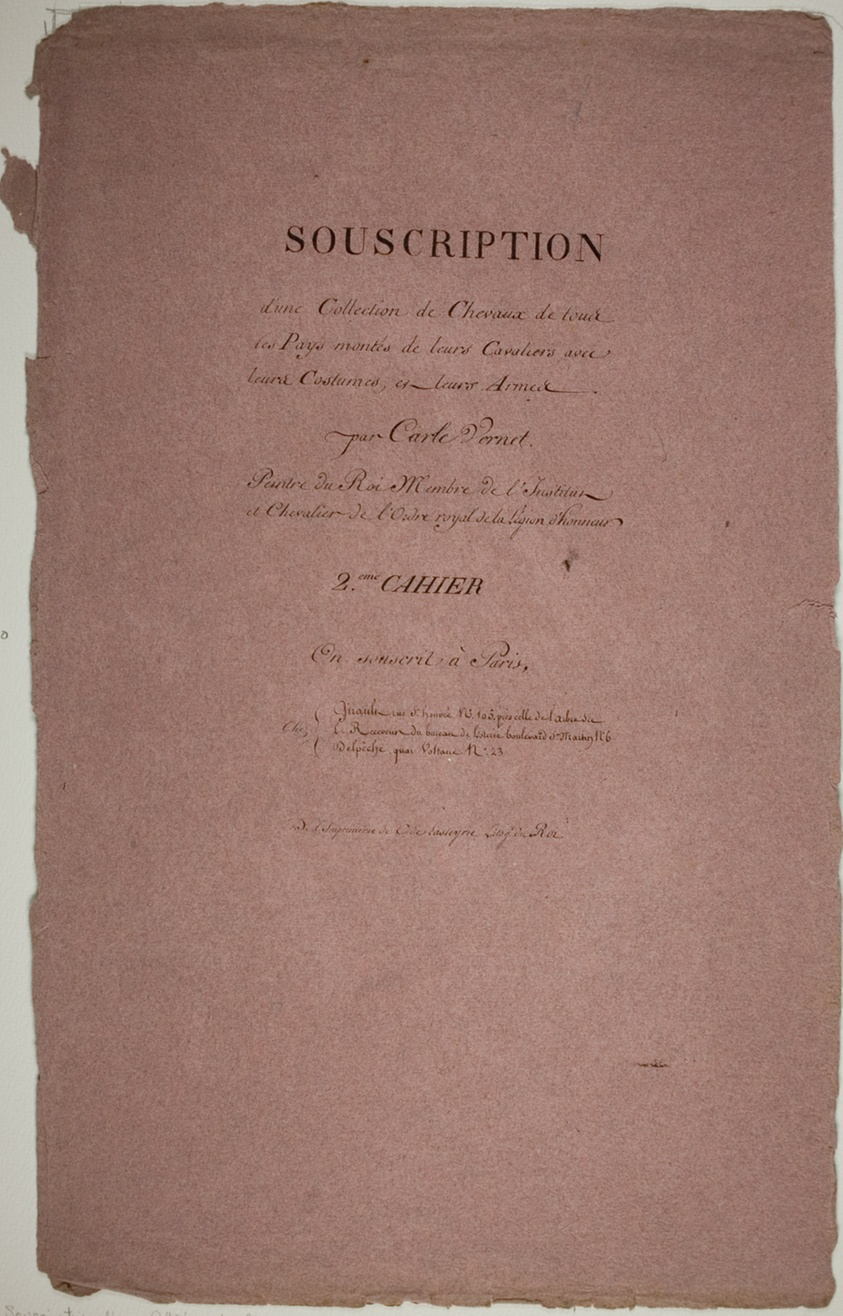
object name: Print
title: Subscription Page, from Horses of Many Countries, second volume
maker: Carle Vernet (French, 1758-1836); printed by Comte de Charles Philibert Lasteyrie du Saillant (French, 1759-1849)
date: c. 1818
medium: Lithograph in black on mauve laid paper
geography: France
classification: lithograph; print; prints and drawing